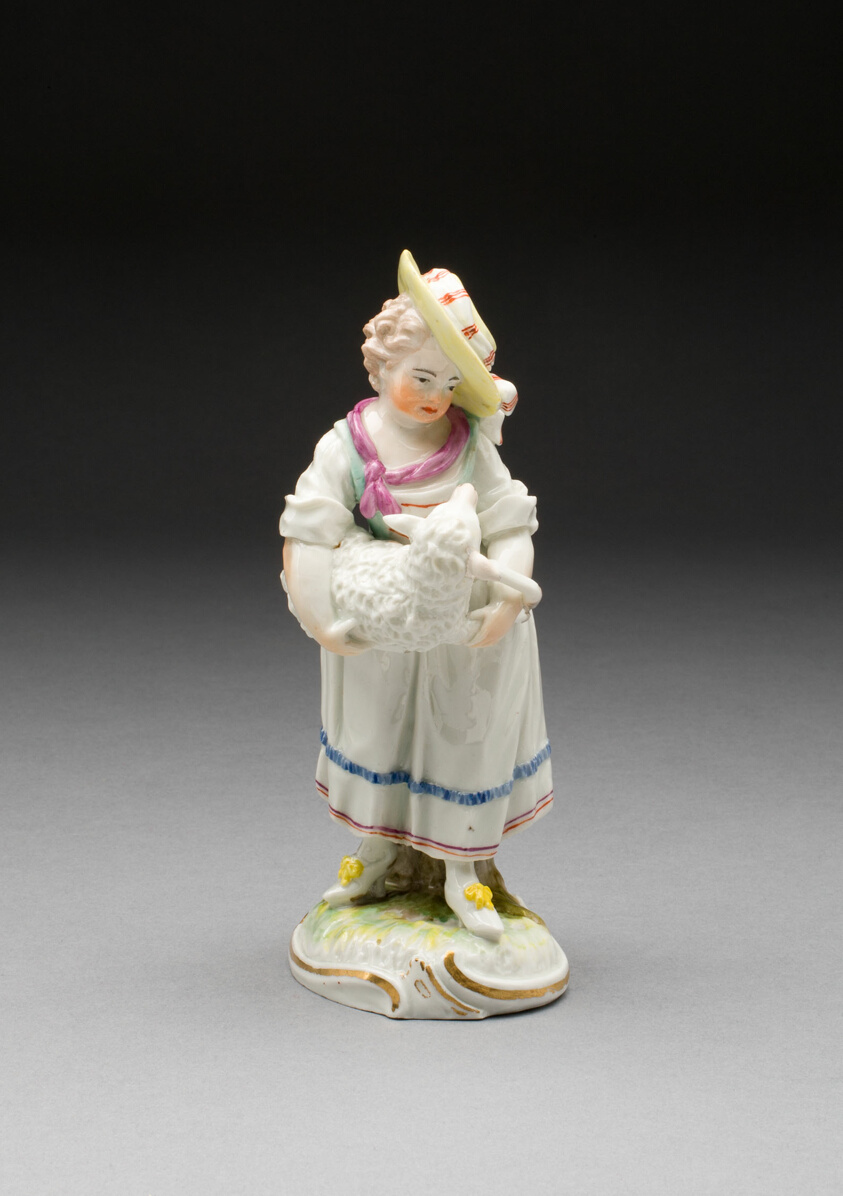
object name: Ceramics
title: Shepherd Girl Holding Sheep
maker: Frankenthal Porcelain Factory; German, founded 1755; Modeler: Lück, Johann Fredrich; German, d. 1797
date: c. 1770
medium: Hard-paste porcelain with polychrome enamel decoration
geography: Frankenthal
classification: sculpture; porcelain; european decorative arts; ceramics